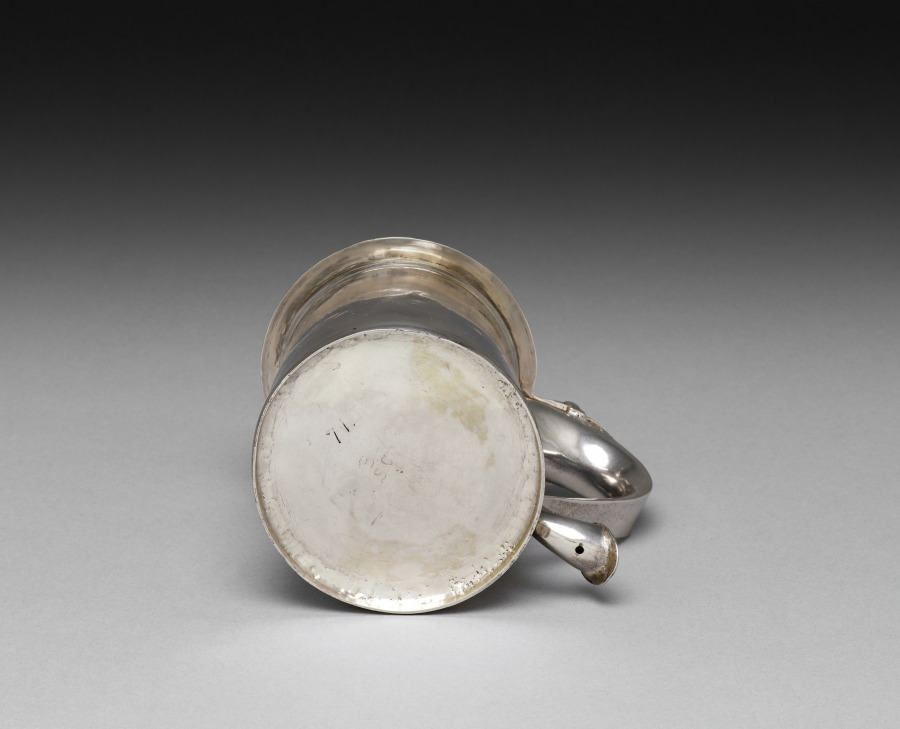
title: Tankard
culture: America, Massachusetts, Boston, early 18th century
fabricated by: John Edwards (British)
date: 1715–1720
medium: silver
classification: Silver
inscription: Engraved on handle: "SB to RA".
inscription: Stamped on side: "IE".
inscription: Engraved underside: "B" above "S.C".